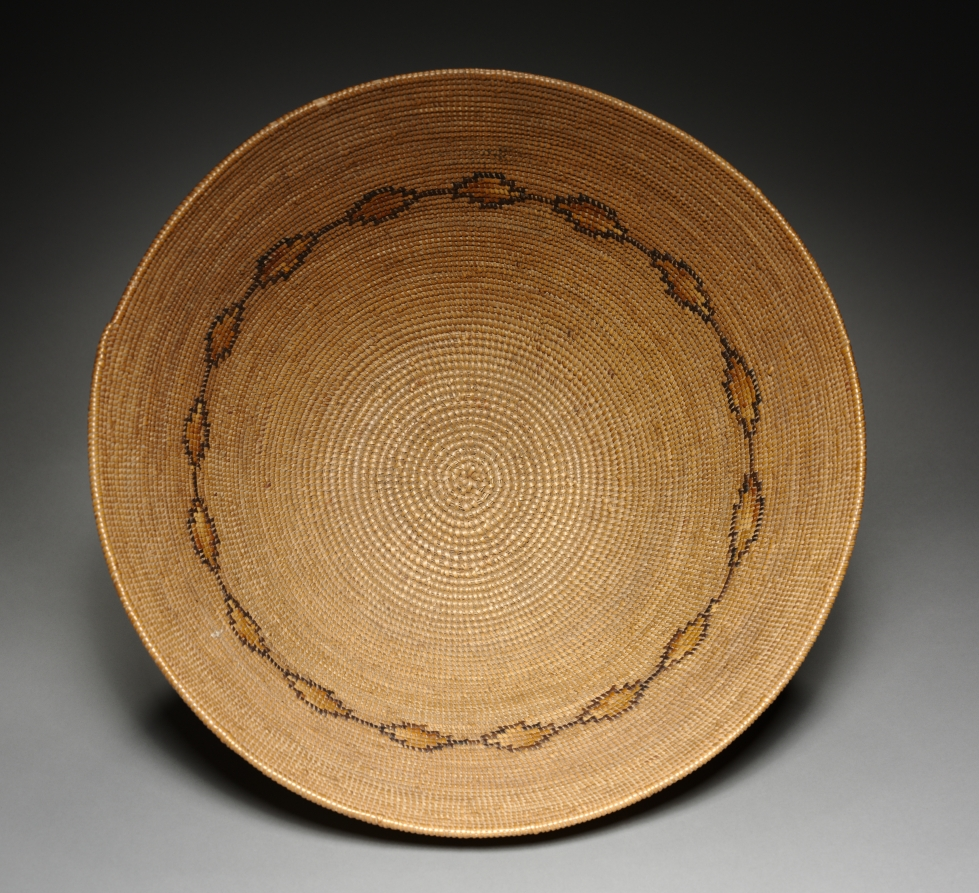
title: Food / Carrying Bowl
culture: California, Southern, Gabrielino (San Gabriel, Mission, or Tongva), 20th century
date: before 1929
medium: coiled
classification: Basketry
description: CMA Bulletin, December 1930